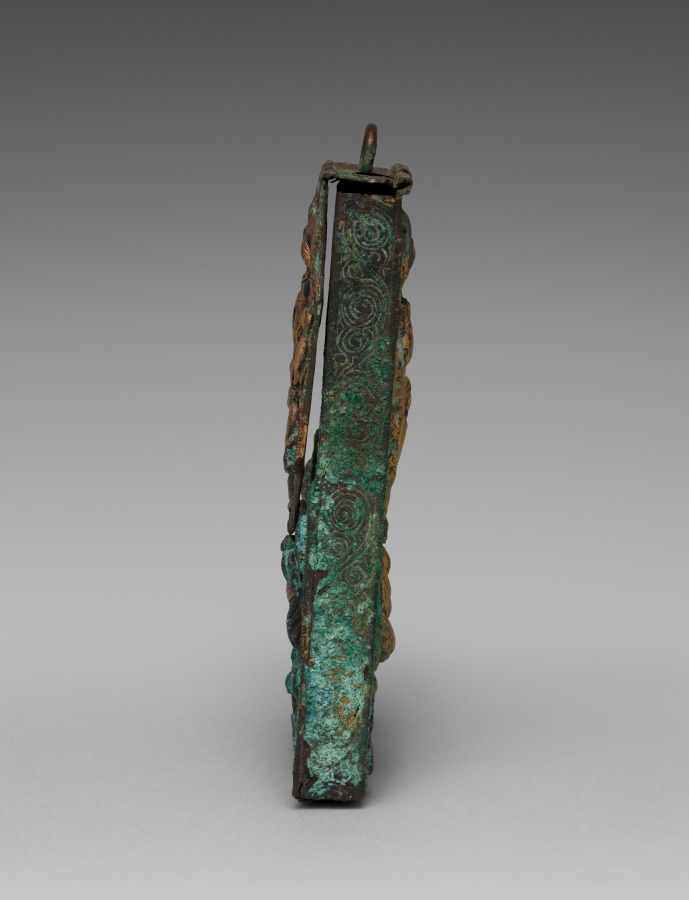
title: Sutra Container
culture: Korea, Goryeo dynasty (918–1392)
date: 1100s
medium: gilt bronze with incised and high relief decoration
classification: Metalwork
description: This is a portable container once used to preserve a miniature Buddhist sacred text. Created by hammering the reverse, high-relief designs on both the front and back of the case depict a peaceful pond where young boys are holding giant lotus flowers in their hands, and a pair of mandarin ducks are swimming. Probably the playful boys represent newly reborn souls in the Pure Land.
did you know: This is a portable container once used to preserve a miniature Buddhist sacred text, particularly useful for traveling Buddhist pilgrims.